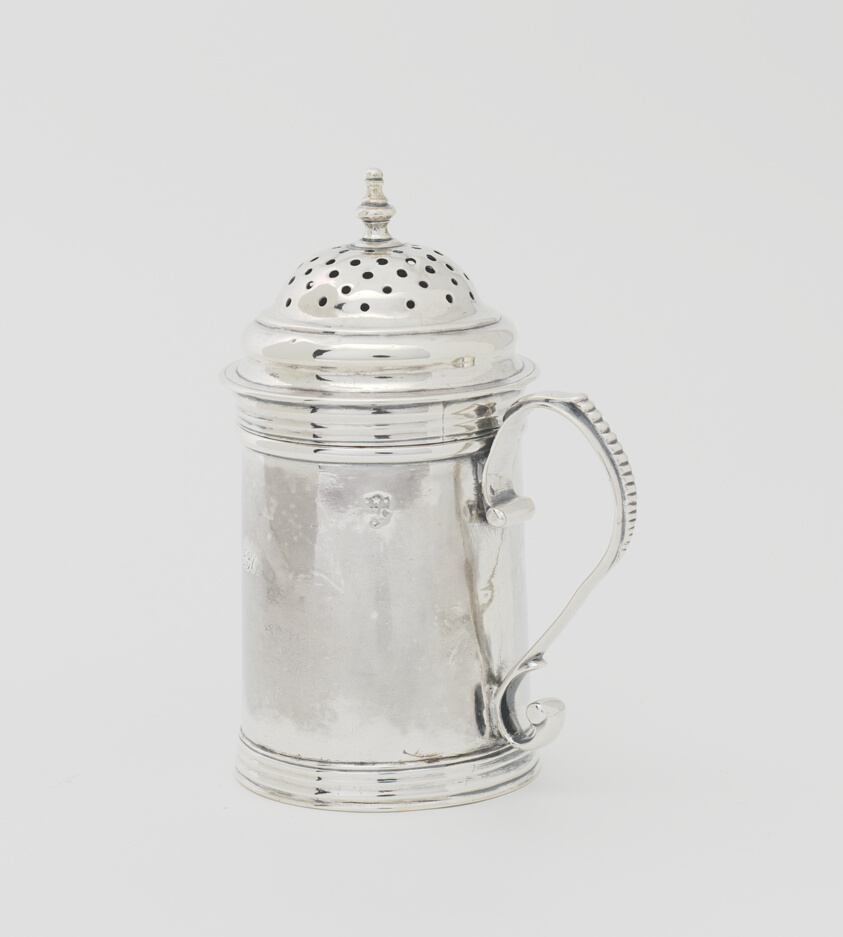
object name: Metalwork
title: Pepper Box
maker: William Cowell, Sr.; American, 1682/83–1736; Boston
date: c. 1720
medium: Silver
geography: Boston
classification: container; box; silver; american decorative arts; american arts; decorative arts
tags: dining, drinking